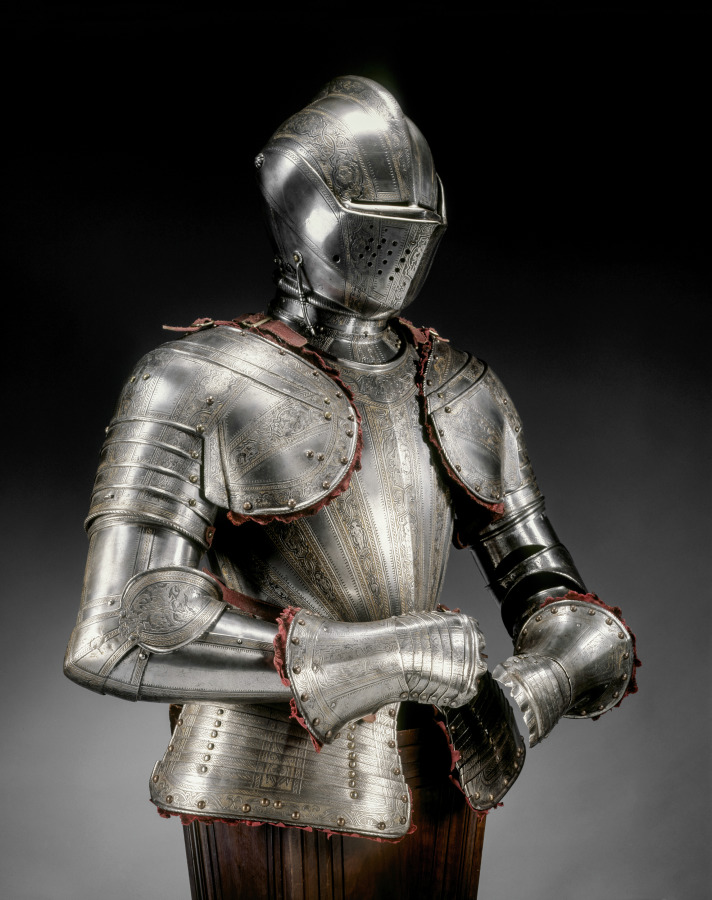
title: Half Armor for the Foot Tournament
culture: Italy, Milan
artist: Pompeo della Cesa (Italian, active 1572–93)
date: c. 1590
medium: etched and gilded steel, brass rivets, leather and velvet fittings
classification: Arms and Armor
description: This armor was designed for the foot tournament, an event that was separate from the equestrian jousts popularized during the Middle Ages and still favored among Renaissance aristocracies throughout Europe. Foot tournaments were commonly fought over a barrier that separated the combatants and gave protection to their legs, so a half-armor such as this one provided sufficient protection. The original owner of this suit would have worn it with colorful puffed and slashed britches and hose. The use of outlandish accessories, such as a large ostrich feather plume (a brass plume holder may be seen on the back of the helmet) and red velvet pickadils between the steel plates, provided additional splendor.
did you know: Pompeo della Cesa was the Armani or Gucci of the 1500s; everyone wanted to wear him.